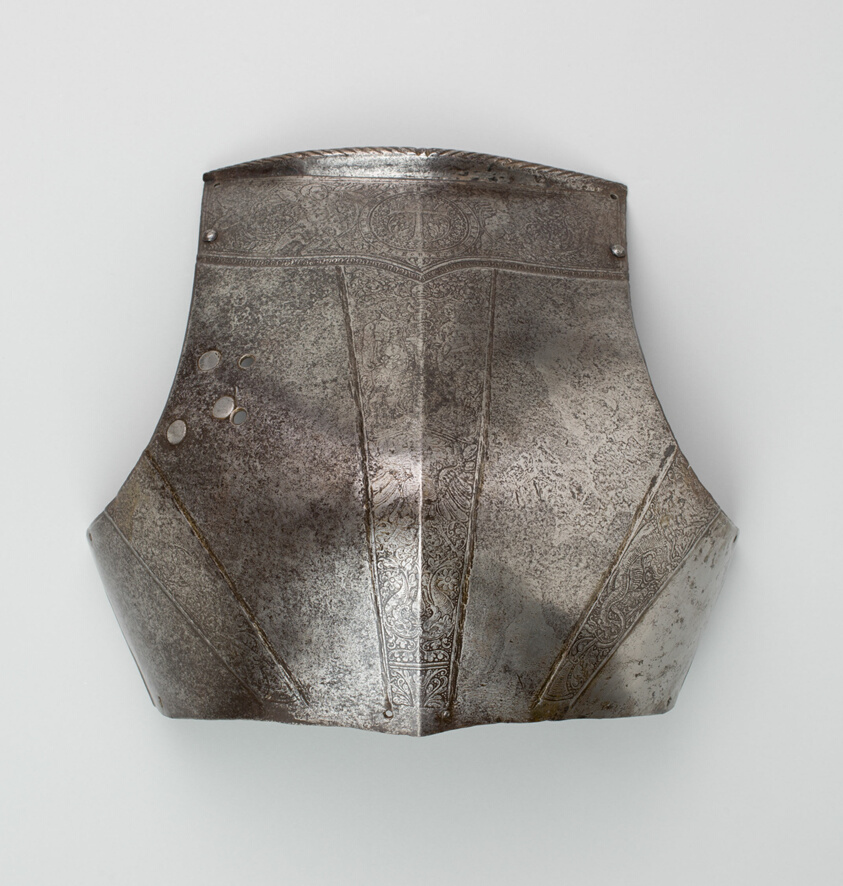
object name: Armor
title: Breastplate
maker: German, Brunswick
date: c. 1540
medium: Steel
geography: Brunswick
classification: suit-element; armor; arms and armor